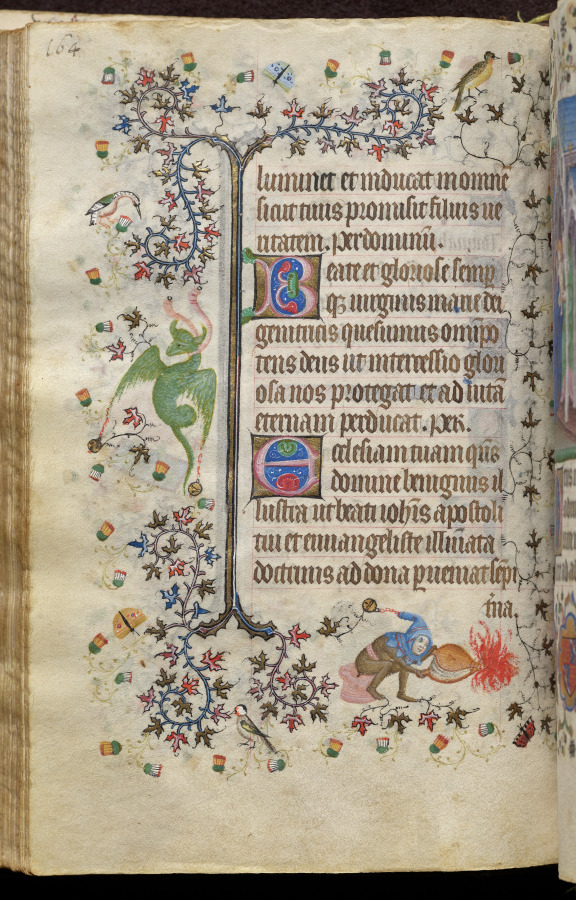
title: Hours of Charles the Noble, King of Navarre (1361-1425): fol. 82v, Text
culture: France, Paris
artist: Master of the Brussels Initials and Associates (French)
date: c. 1405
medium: ink, tempera, and gold on vellum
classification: Bound Volume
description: This precious volume was obviously highly prized by its owner, the French-born King of Navarre, who had his coat of arms painted on no less than twenty folios. Rather than directly commissioning this manuscript from a specific workshop, it seems that Charles the Noble acquired his book of hours -- perhaps ready-made for the luxury market -- while on a trip to Paris in 1404-05. A collaborative effort, six painting styles are evidenced within the pages of this codex, those of two Italians, two Frenchmen, and two Netherlanders. The painter who was responsible for the planning and decoration of the book, and who produced seventeen of the large miniatures, was a Bolognese artist known as the Master of the Brussels Initials. His principal assistant, responsible for most of the borders, was a Florentine who signed his name "Zecho" da Firenze on folio 208 verso.